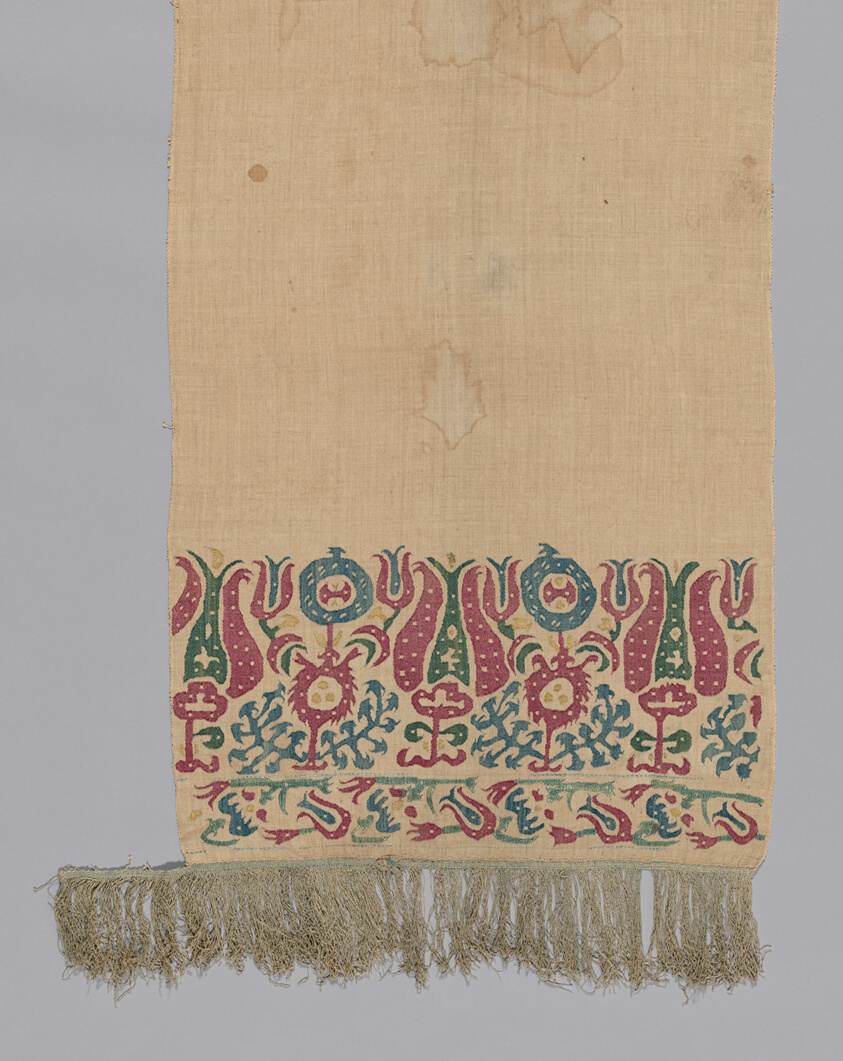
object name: Textile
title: Panel (For a Bedcover)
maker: Greece, Epirus Province or Ionian Islands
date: 17th century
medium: Linen, plain weave; embroidered with silk in running (pattern darning) and stem stitches; edged with silk, twined fringe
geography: Greece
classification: textile; needlework (visual works)